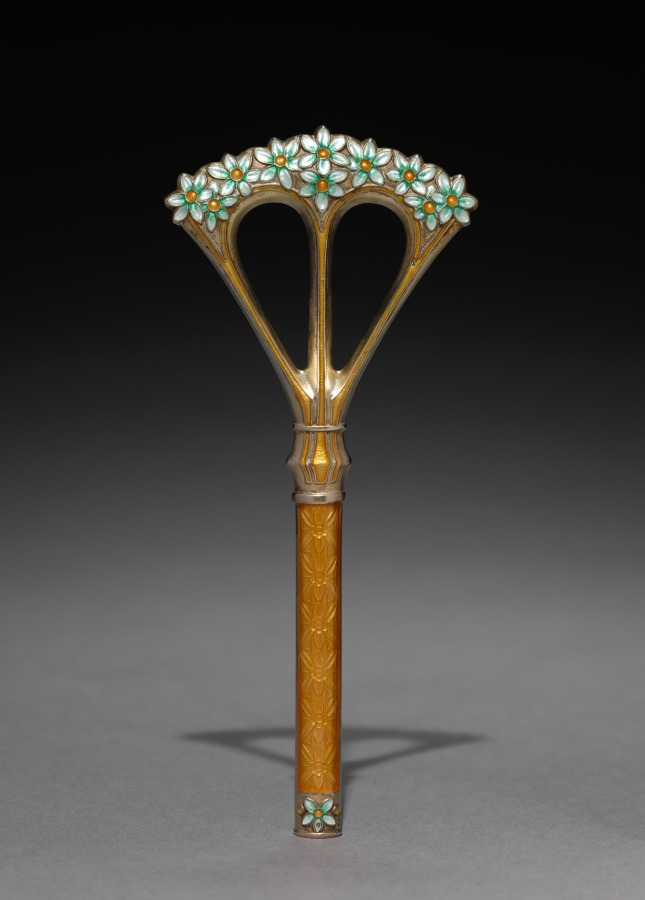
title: Parasol Handle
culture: Norway, Oslo, early 20th Century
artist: firm of Jacob Tostrup (Norwegian, 1806–1890)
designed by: possibly by Torolf Prytz (Norwegian)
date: c. 1900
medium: silver and enamel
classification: Enamel